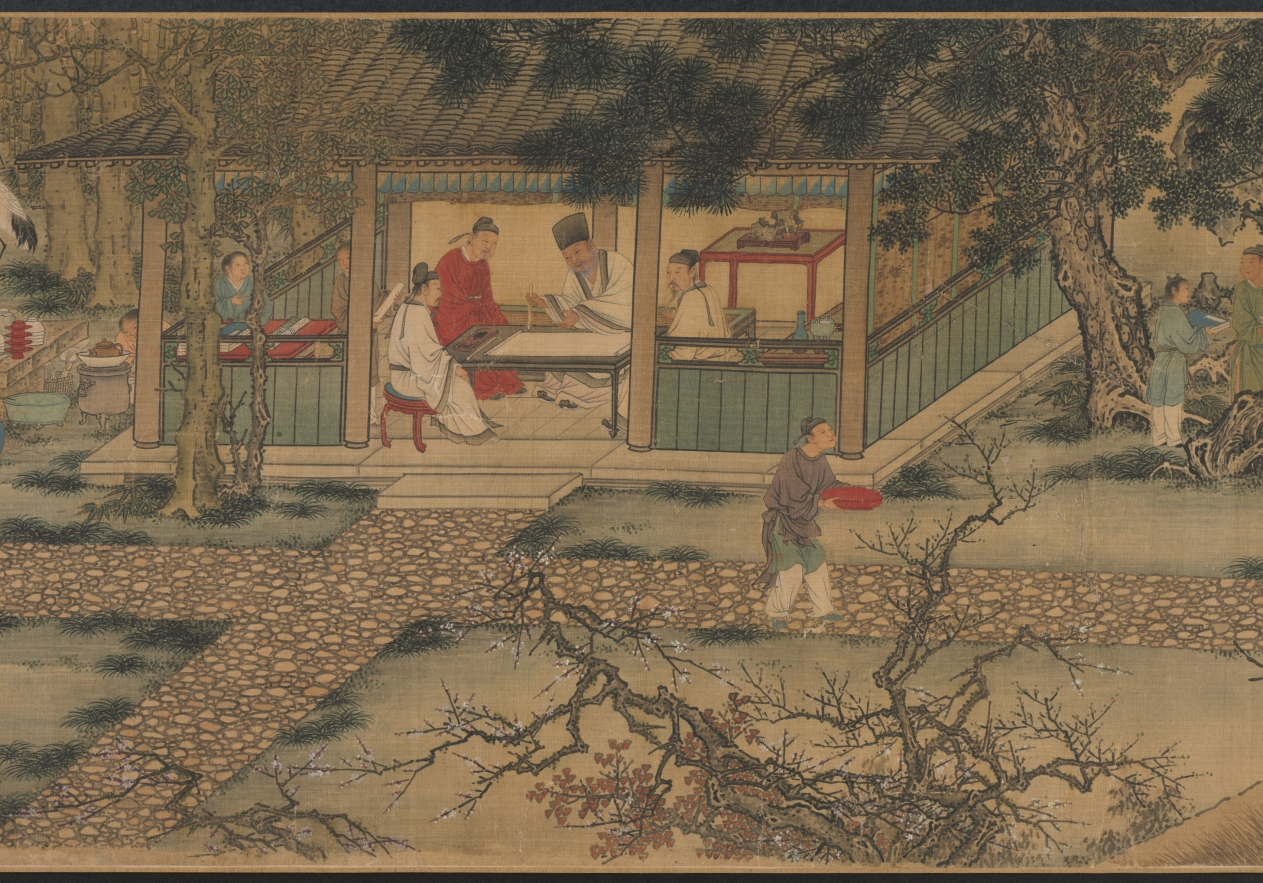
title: The Nine Elders of the Mountain of Fragrance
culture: China, Ming dynasty (1368–1644)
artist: attributed to Xie Huan (Chinese, c. 1370-c.1450)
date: 1426–52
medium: handscroll, ink and color on silk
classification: Painting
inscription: 4 seals: 2 of Xiang Yuanbian 項元汴 (1525–1590); 1 of the Qianlong Emperor (r. 1736-95); 1 of C. C. Wang 王季遷 (1907–2003)